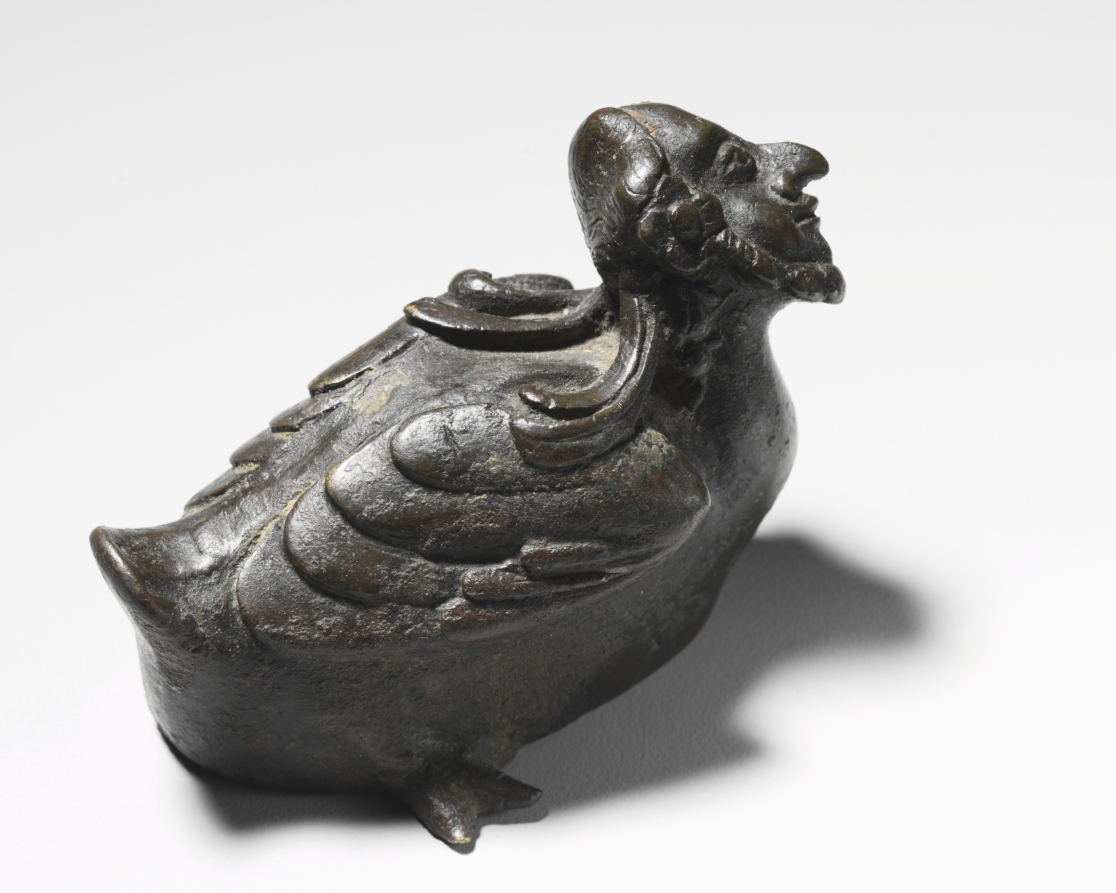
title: Bird with Human Head, possibly Hermes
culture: Pakistan, Gandhara, Kushan period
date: c. 200s–300s CE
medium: bronze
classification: Sculpture